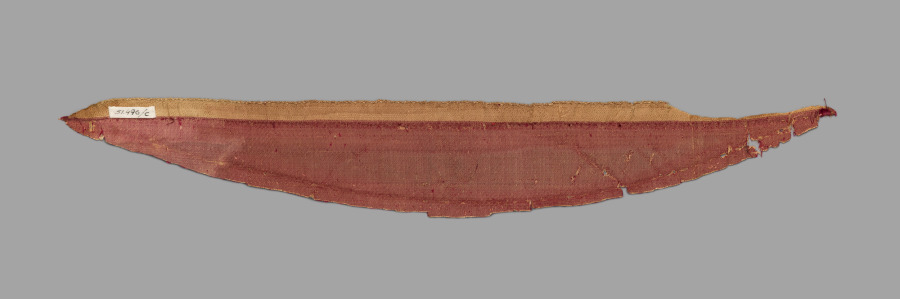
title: Pieces from Disassembled Cape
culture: Italy, 15th century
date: 1400s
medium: Velvet (cut and voided)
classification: Velvet